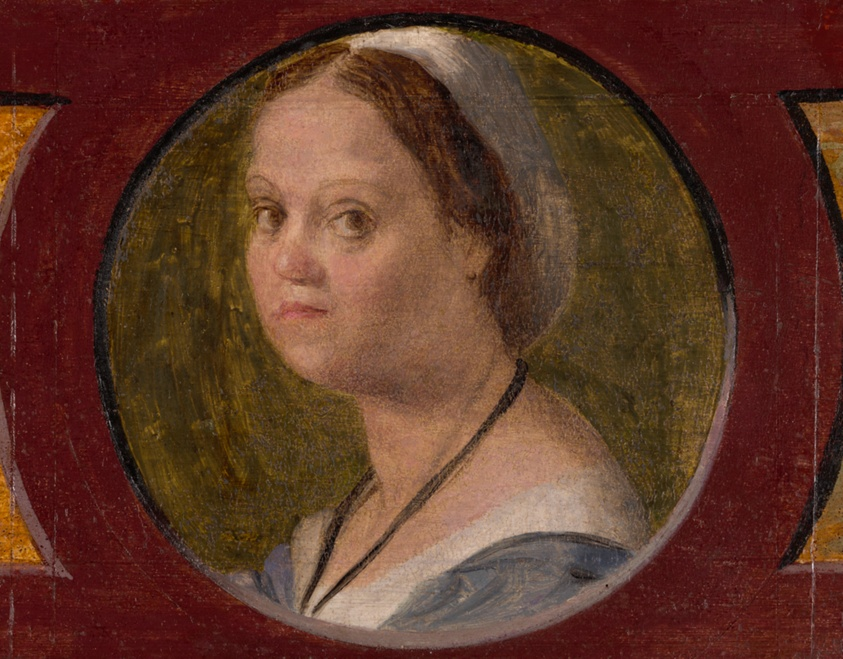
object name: Painting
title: Lucrezia di Lippo di Iacopo Guidi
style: sixteenth century, 16th Century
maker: Andrea del Sarto (Italian, 1486–1530)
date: 1525/28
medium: Oil on panel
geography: Italy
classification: oil on panel; portrait; paint; Italian; painting; european painting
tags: portraits: female subject, woman, portraits, portrait, jewelry